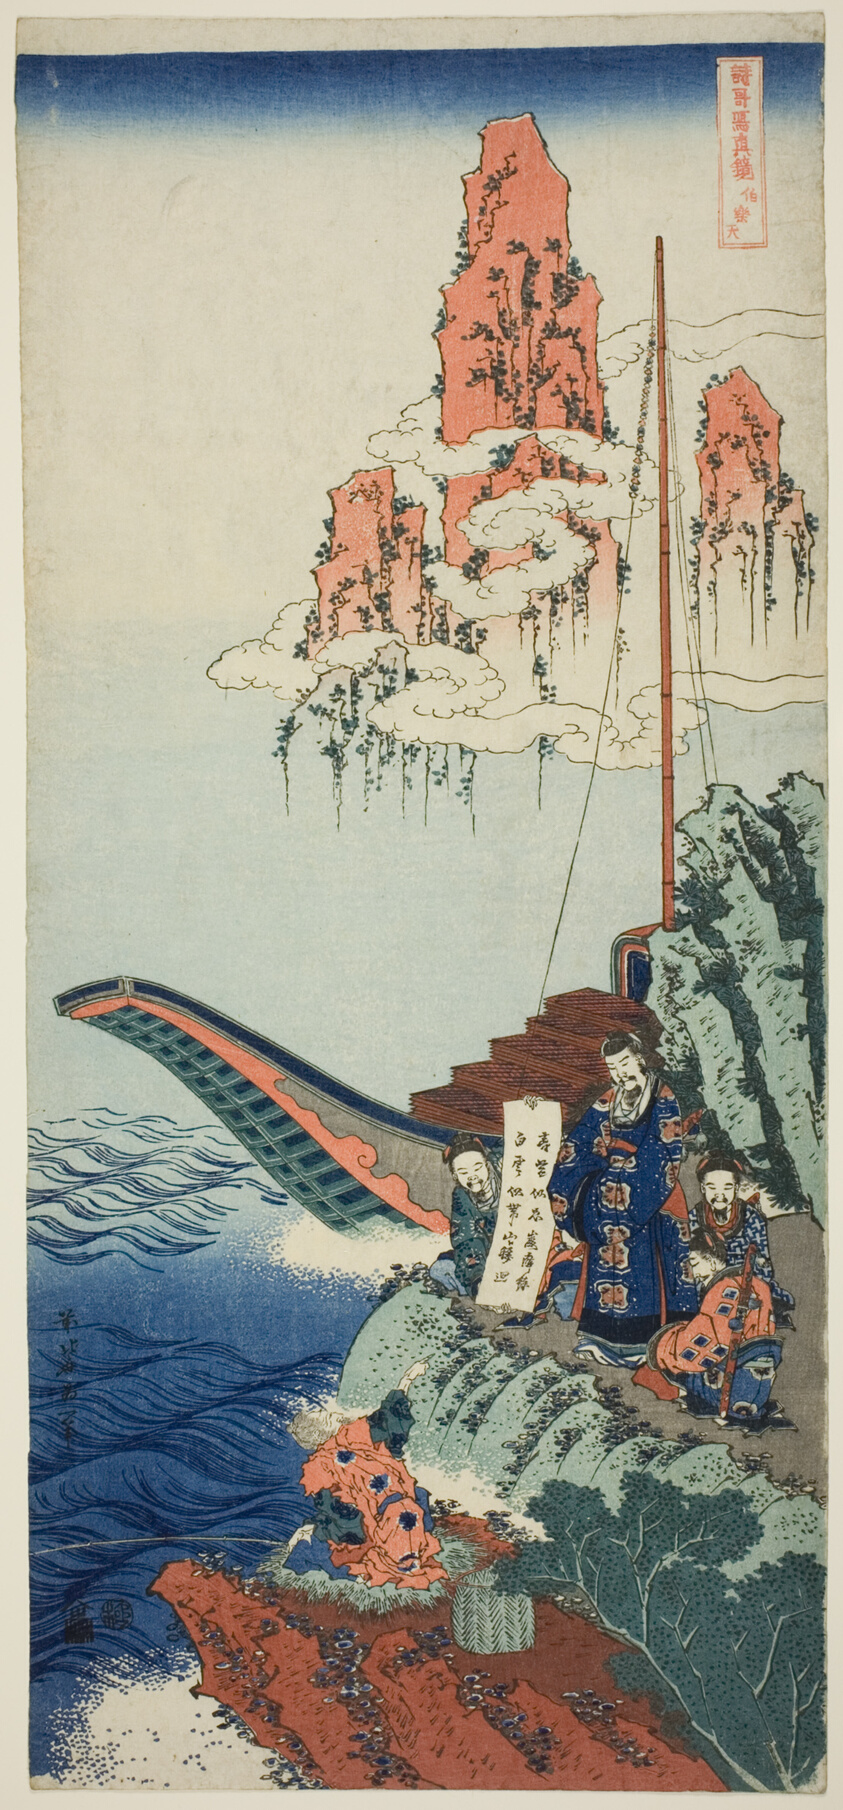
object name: Print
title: Bai Juyi (Japanese: Hakurakuten), from the series "A True Mirror of Japanese and Chinese Poems (Shiika shashin kyo)"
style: Japanese (culture or style)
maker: Katsushika Hokusai 葛飾 北斎; Japanese, 1760-1849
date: c. 1833/34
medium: Color woodblock print; vertical nagaban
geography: Japan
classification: woodblock print; print; asian art